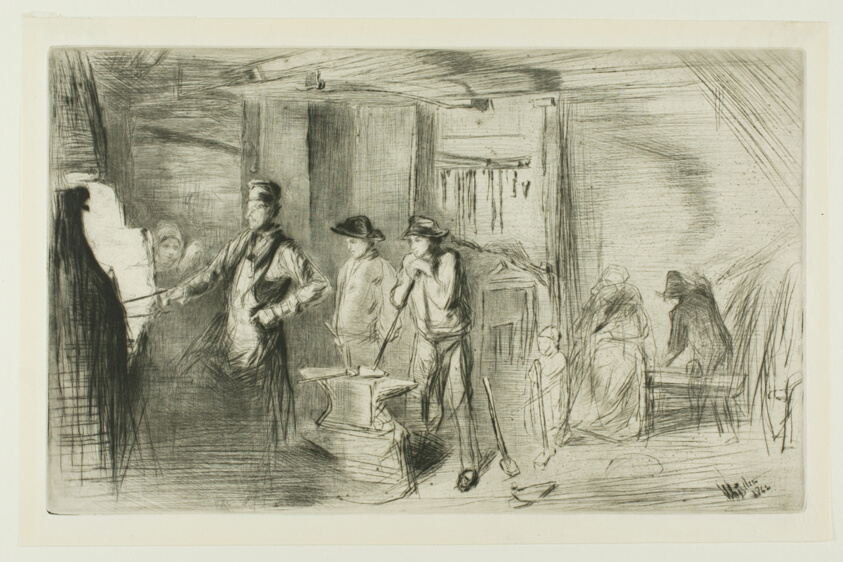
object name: Print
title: The Forge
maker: James McNeill Whistler (American, 1834-1903)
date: 1861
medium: Drypoint in black ink on ivory laid paper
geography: United States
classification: drypoint; print; prints and drawing; paper